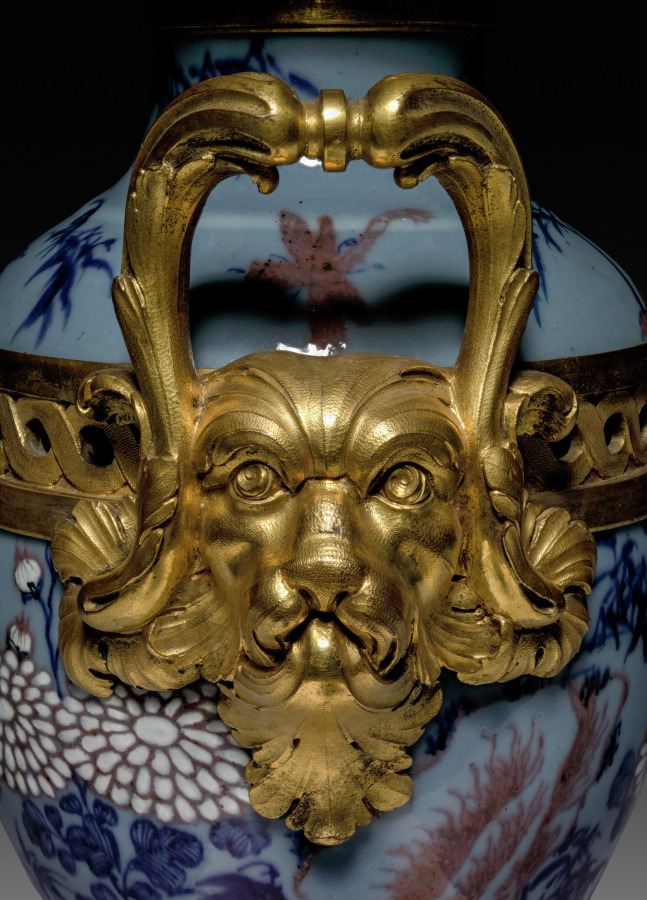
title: Vase for a Garniture Set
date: 1736–1770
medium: Chinese hard-paste porcelain, gilt bronze, enameled metal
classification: Furniture and woodwork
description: The fascination with Chinese porcelain among aristocratic circles increased during the reign of Louis XV. In reaction to the perceived excesses of elaborate naturalistic ornament of the 1750s, mount makers increasingly turned to neoclassical designs, known as Goût Grec (Greek taste) in the 1760s and 1770s. These beautifully chased gilt-bronze mounts feature classical Greco-Roman motifs such as lion masks, acanthus and laurel leaves, and pilasters.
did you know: A set of vases and clock, connected visually by the use of the same materials, often adorned a mantlepiece or the top of a large piece of furniture, such as a commode or console, within a room.